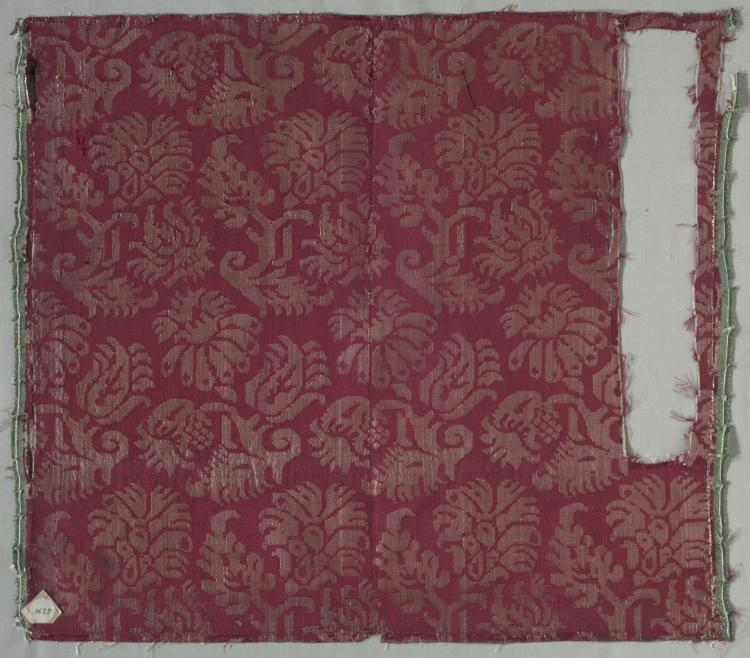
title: Two Lengths of Silk Damask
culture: Italy, 17th century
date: 1600s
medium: damask, silk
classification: Textile